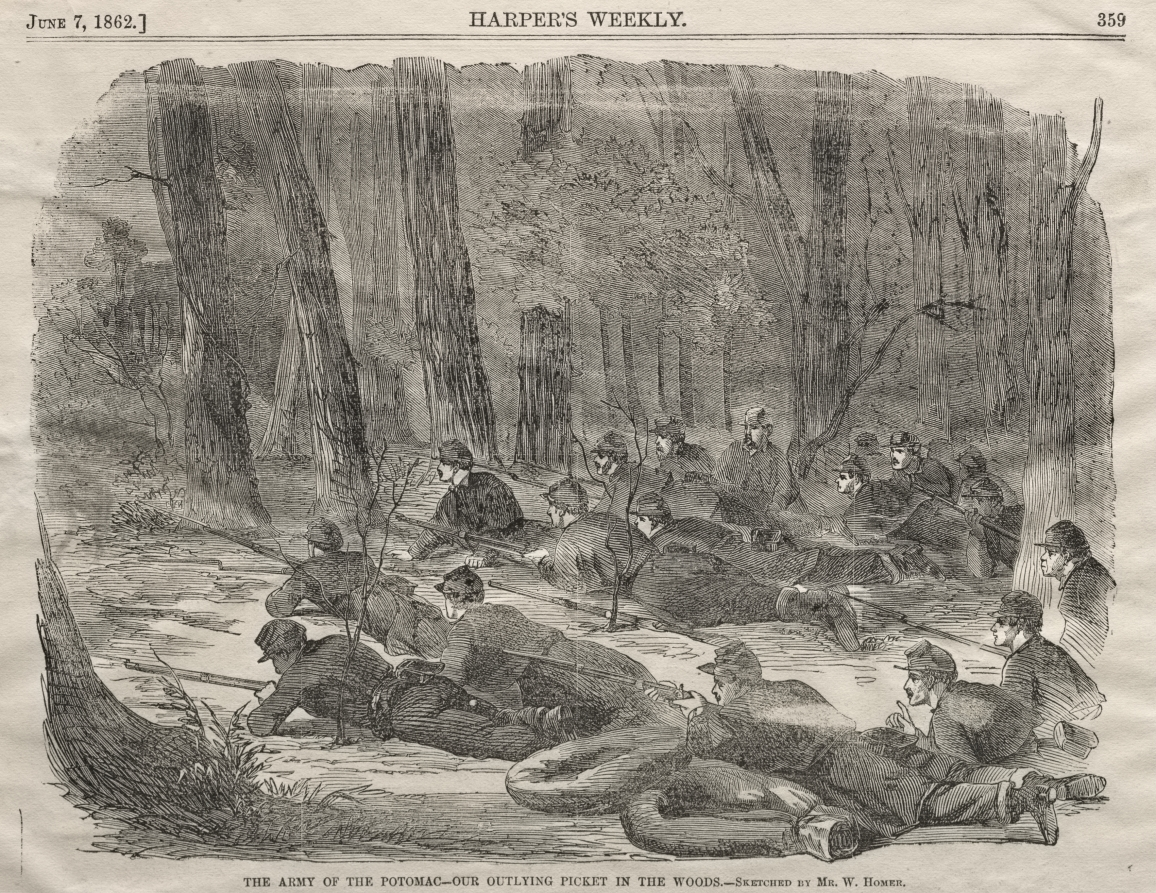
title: The Army of the Potomac - Our Outlying Picket in the Woods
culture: America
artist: Winslow Homer (American, 1836–1910)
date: 1862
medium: wood engraving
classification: Print